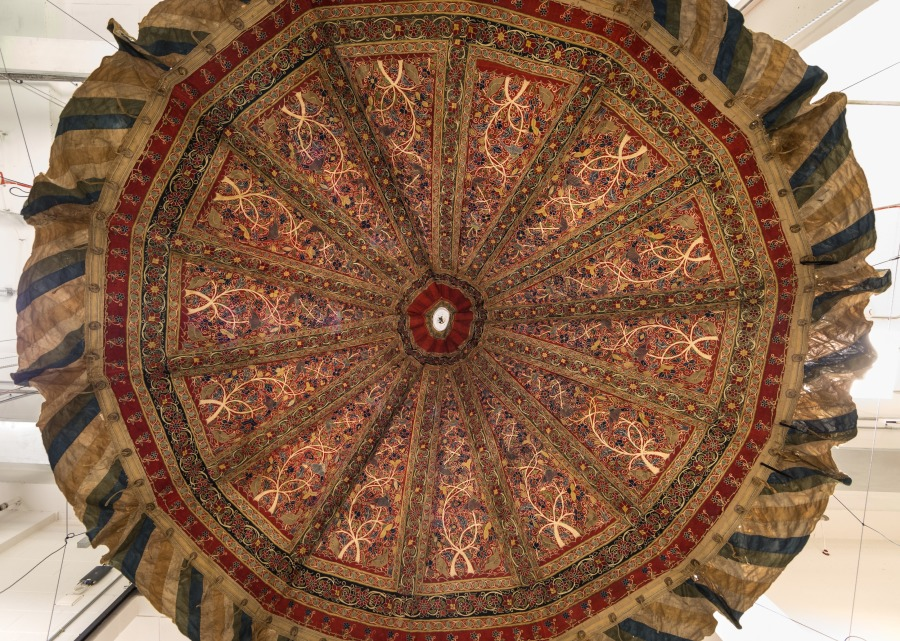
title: Royal Round Tent made for Muhammad Shah (Roof)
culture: Iran, Rasht, Qajar period (1779-1925)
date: 1834–48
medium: Interior: wool: plain weave, inlaid work; silk: embroidery, chain stitch; tape, leather; Exterior: cotton, wool: plain weave; rope, iron ring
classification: Textile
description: Royal tents were potent symbols of authority, wealth, and power throughout the greater Middle East. Rulers owned thousands of tents. They were used for shelter, shade, and innumerable functions in tent compounds that were essential for imperial ceremonies, travel, and military campaigns. Distinguished by size with elaborately decorated interior walls and ceilings, tents could be as large as castles. Opulent tents were also presented as imperial gifts. Tents are only known through documents before 1600. For example, in Baghdad in 809, Caliph Harun al-Rashid owned 4,000 ceremonial tents and 150,000 camping tents that were stored in the imperial Abbasid treasury. An astonishing variety and quantity of tents were housed in the royal Fatimid tent storeroom in Cairo in 1068-69, including "military tents, fortress tents, and castle tents, manufactured of . . . gold-brocaded stuff embroidered with designs of elephants, wild beasts, horses, peacocks, birds." Since 1600, Ottoman Turkish tents with elaborate floral decoration have been preserved in Istanbul in the Topkapi Palace Museum and Military Museum, and in European collections as war booty, primarily from the Ottoman Turks' attempt to conquer Vienna in 1683. These tents are not done in the Rasht technique, but rather are applique. In contrast, royal tents from Iran are extremely rare. This spectacular ceremonial tent is embroidered with the name of its owner, Muhammad Shah, who ruled Iran from 1834 to 1848 during the Qajar dynasty. The radiant jewellike interior features exuberant flora, blossoming vines, and robust birds made with colored wool embellished with silk-thread embroidery.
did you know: Rasht work is named after the city on the Caspian Sea in present-day Iran, which was a major silk trade center with numerous textile workshops.